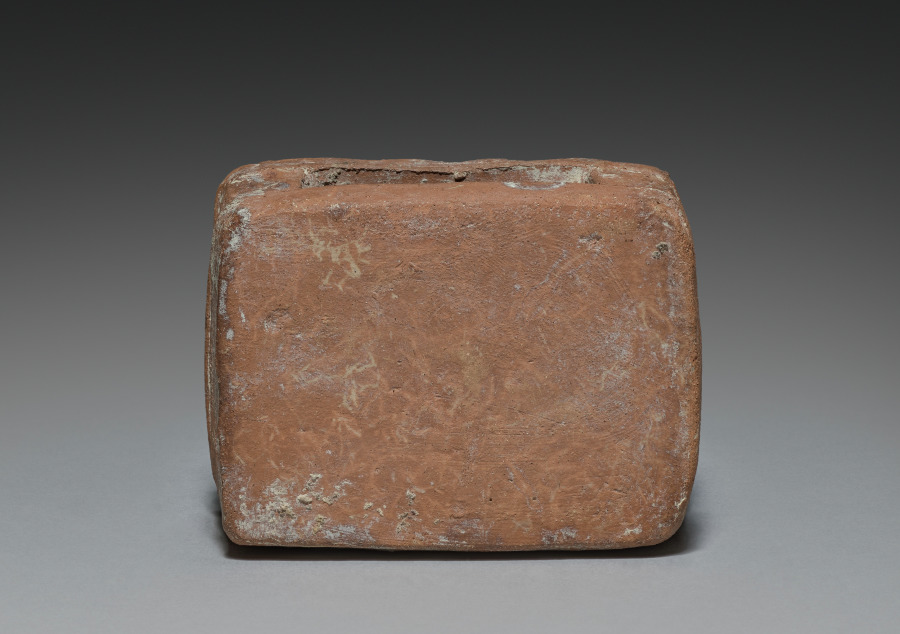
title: Seated Lord with Removable Headdress: Stool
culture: Mesoamerica, Maya, probably Jaina Island, Late Classical period, 7th-9th century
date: 600–800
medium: ceramic and slip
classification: Ceramic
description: The major Maya grave offerings on Jaina Island were ceramic figurines that depict deities and humans in a variety of roles. The stool belongs to a seated figure who represents a male, perhaps another warrior, who wears a huge zoomorphic headdress.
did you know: It is estimated that some 20,000 people were buried on the tiny island of Jaina over a 500-year period.